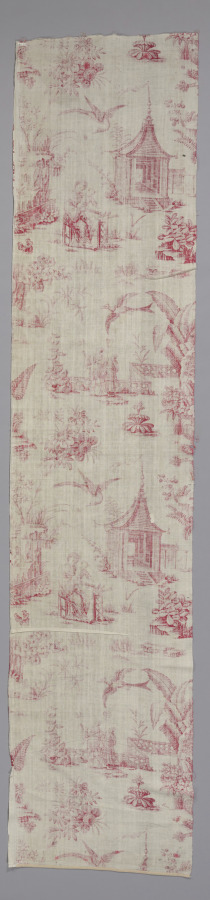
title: Copperplate-Printed Cotton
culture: England, Chambers, 18th century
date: 1700s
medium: copperplate printed cotton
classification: Textile